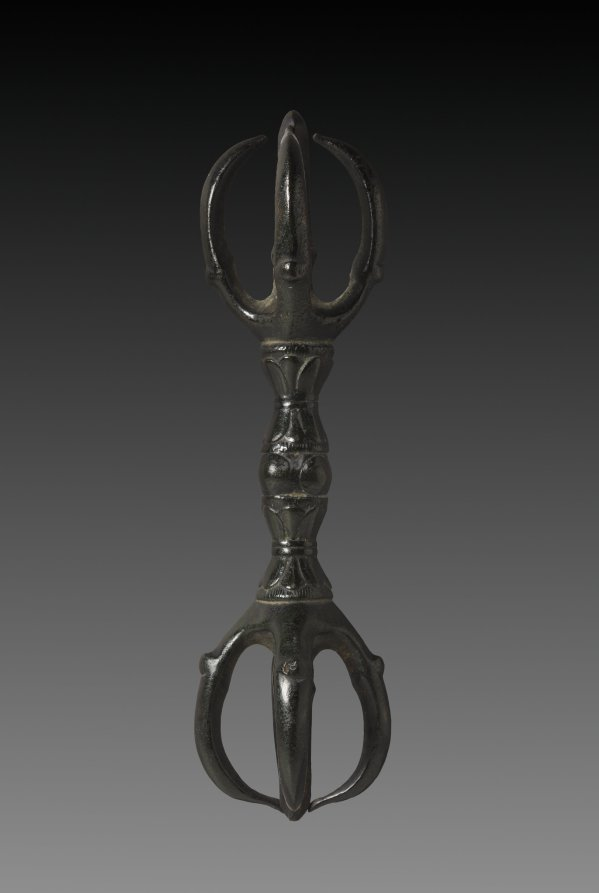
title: Five-pronged Vajra Pestle (Gokosho)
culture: Japan, Heian period (794–1185)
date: 900s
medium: bronze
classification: Metalwork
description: Resembling weapons wielded by deities described in the Vedas, ancient Indian religious scriptures, the vajra pestle (kongōsho) has long been used in Esoteric Buddhist rituals. The word vajra means diamond and thunderbolt in Sanskrit. Vajras are thus indestructible and powerful tools of Buddhism. The number of prongs has significance, with single-, three-, and five-pronged vajras being used for different purposes. The stylized thunderbolt known as a vajra also connotes the speed of lightning and the indestructible qualities of diamond to best describe the attributes of Tantra. Vajras are ubiquitous in tantric art and ritual practices. This example from the Heian period (784-1185) reveals the early spread of Tantra from India across China and Southeast Asia to enter Japan where it is known as Shingon. A Japanese monk named Kūkai founded the Shingon sect of Esoteric Buddhism after he received the texts and teachings from a Chinese tantric master. When he returned to Japan in 806, he founded the influential Shingon sect.